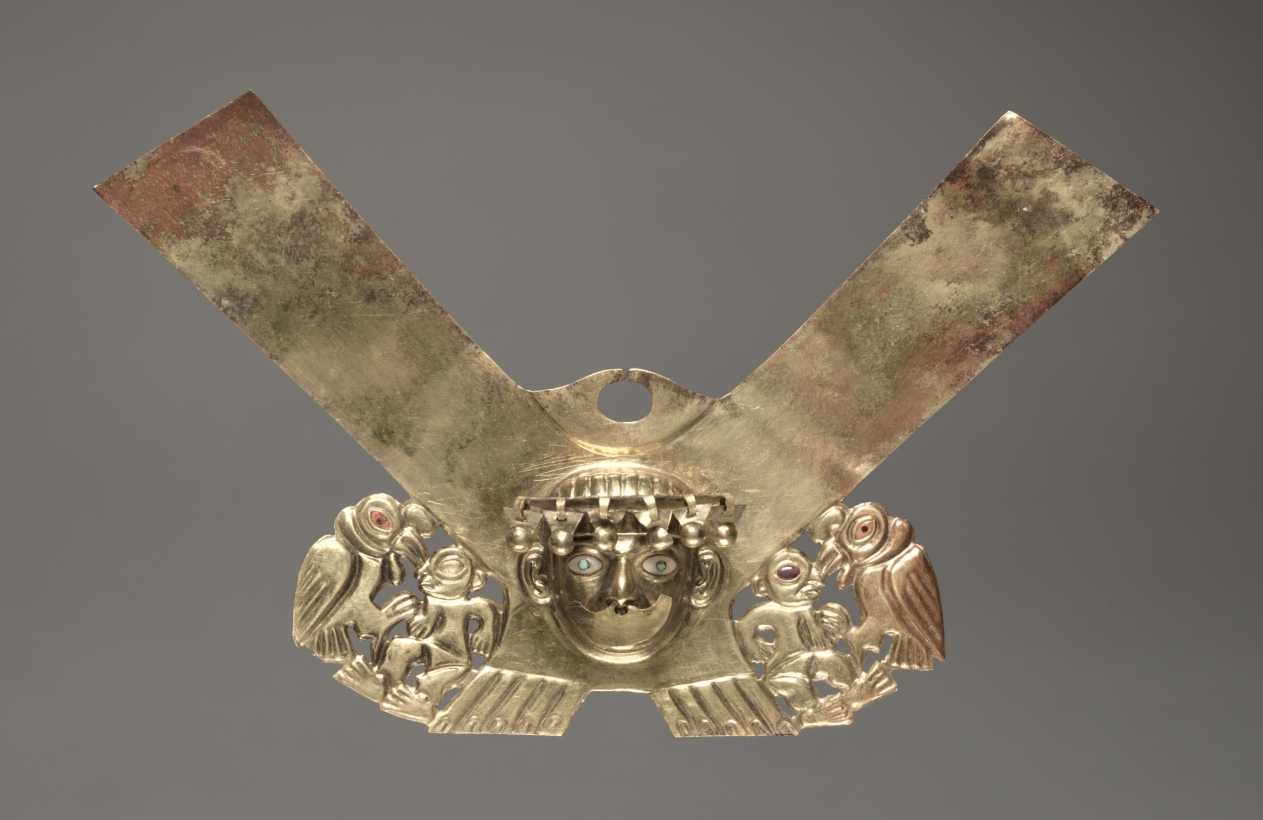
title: Nose Ornament with Human Head and Condors Attacking Humans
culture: Peru, North Coast, Moche culture (50–800 CE), early Intermediate Period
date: c. 100–300 CE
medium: gold alloy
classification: Metalwork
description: A crucial element of Moche royal regalia was the nose ornament, whose imagery varies from benign to predatory. One ornament here depicts a human head, perhaps a ruler’s portrait, flanked by birds that attack human victims. In another, two supernatural decapitators brandish knives over a row of severed human heads. The third is an elegant composition that combines serpents with long-necked water birds. The Moche were among the Andes’ most inventive metalsmiths, and they developed many complex techniques for joining and enriching the surfaces of metals, which they usually worked by hammering rather than casting. The gold-and-silver ornaments were made by first joining gold and silver sheets through heating and hammering. Then came the relief decoration, followed by the selective removal of metal along the joins. Finally, the ornament was trimmed and polished.